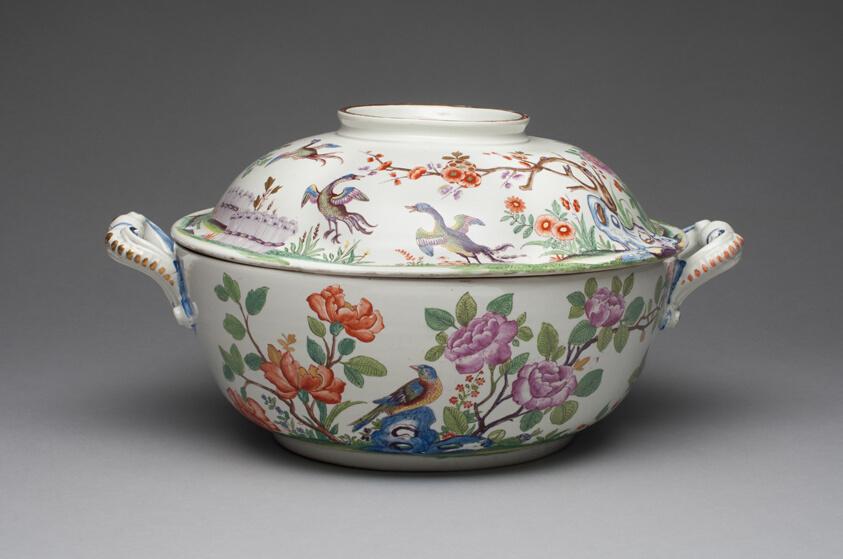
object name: Ceramics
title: Tureen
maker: Du Paquier Porcelain Manufactory (Austrian, 1718-1744)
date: c. 1725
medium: Hard-paste porcelain, polychrome enamels, and gilding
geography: Vienna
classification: tableware; ceramics; porcelain; european decorative arts